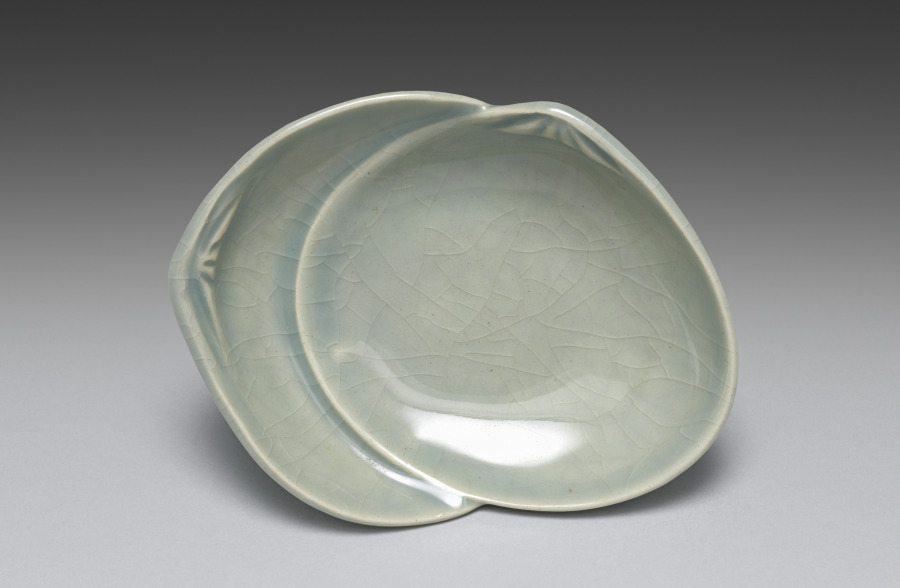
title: Dish from Saucers with Matching Shells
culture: Japan, Meiji period (1868–1912)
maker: Seifū Yohei III (Japanese, 1851–1914)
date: 1893–1914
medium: Porcelain with molded design and green crackled glaze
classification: Ceramic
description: Yohei III’s main output for his sophisticated clientele was in the form of tea sets and dining sets. He created a range of dishes in green glazes. He often produced in pairs, sets of five, or sets of ten. The set of five dishes with a more complex form is described as having a “water-colored glaze” (mizuiroyū). These are shaped like clam half shells, a reference to a game in which shell halves painted with narrative scenes or a variety of motifs must be matched back together by the players. The dishes have molded details to articulate the shell forms, and the crackling across each shell adds another dimension to the surface. Each dish is set on three small feet, formed by a pinched piece of clay and attached to an unglazed area on the underside of the dish. Curiously, while four of the dishes are stamped with the artist’s mark, one has instead a signature carved into the base.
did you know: Each of the paired-shell dishes has its own compartment in a long, flat box.